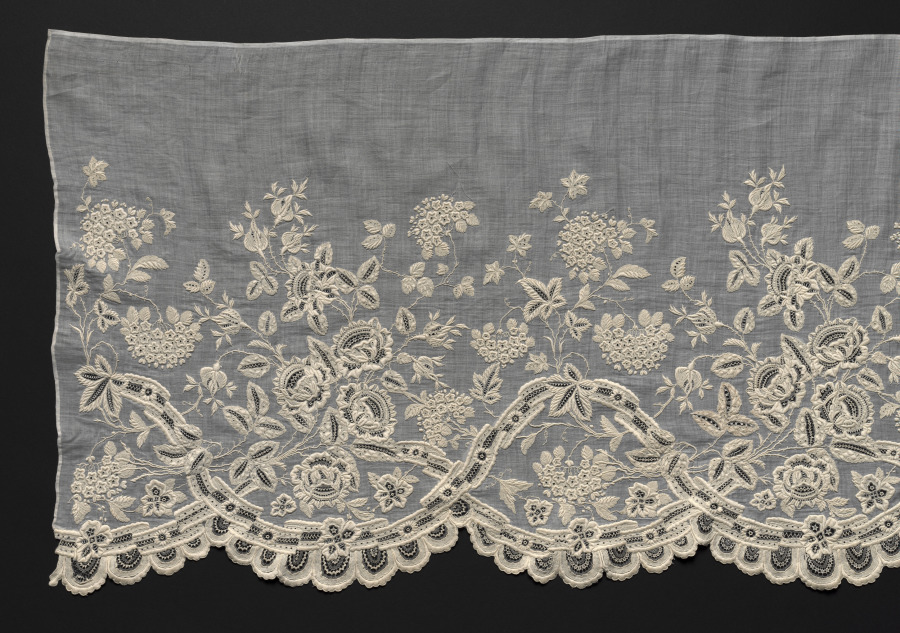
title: Flounce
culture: France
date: 1800–1820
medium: Plain weave cotton: embroidered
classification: Embroidery